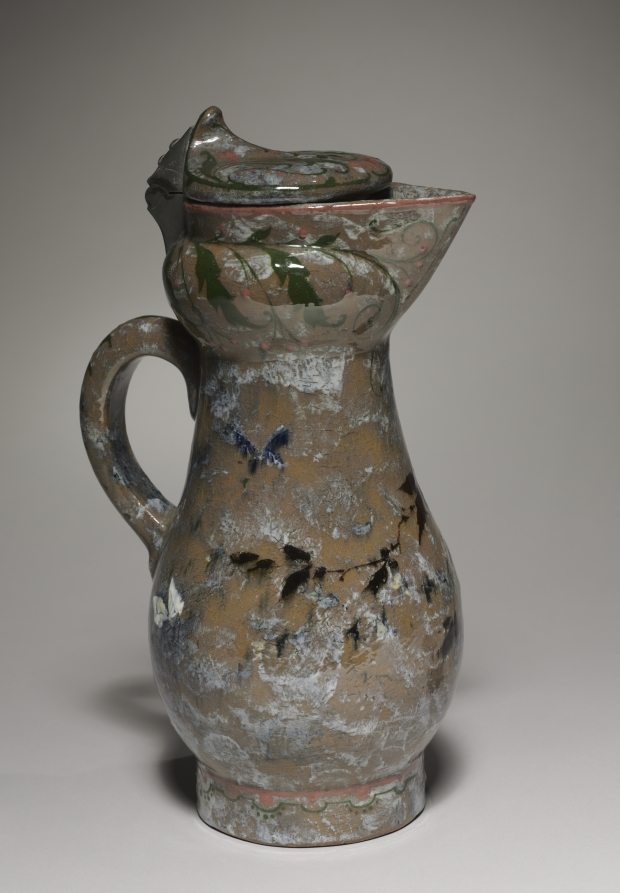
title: Covered Jug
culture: France, 19th century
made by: Haviland Factory at Auteuil (French)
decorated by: Charles Midoux (French)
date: 1878–82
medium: earthenware with pewter hinge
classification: Ceramic